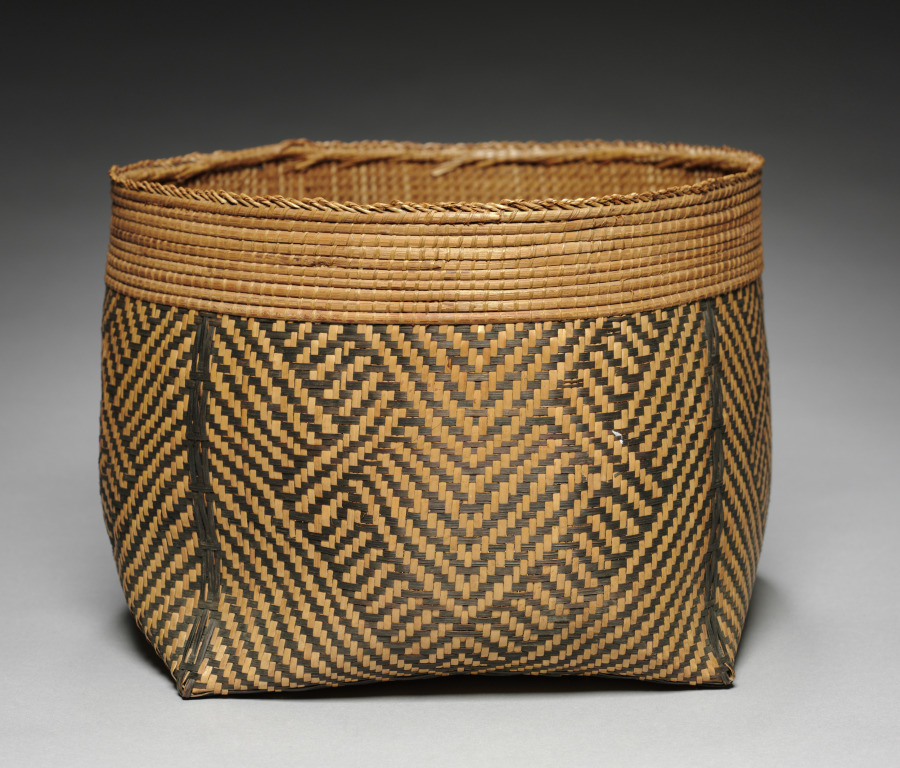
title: Basket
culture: Africa, Central Africa, Democratic Republic of the Congo, Mangbetu-style maker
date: by 1928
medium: Plant fibers and dye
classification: Basketry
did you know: This woven hat looks brand new because it was one of the many items the business-savvy chief of Ekibondo had artists and artisans make for the foreigners who passed through his village.